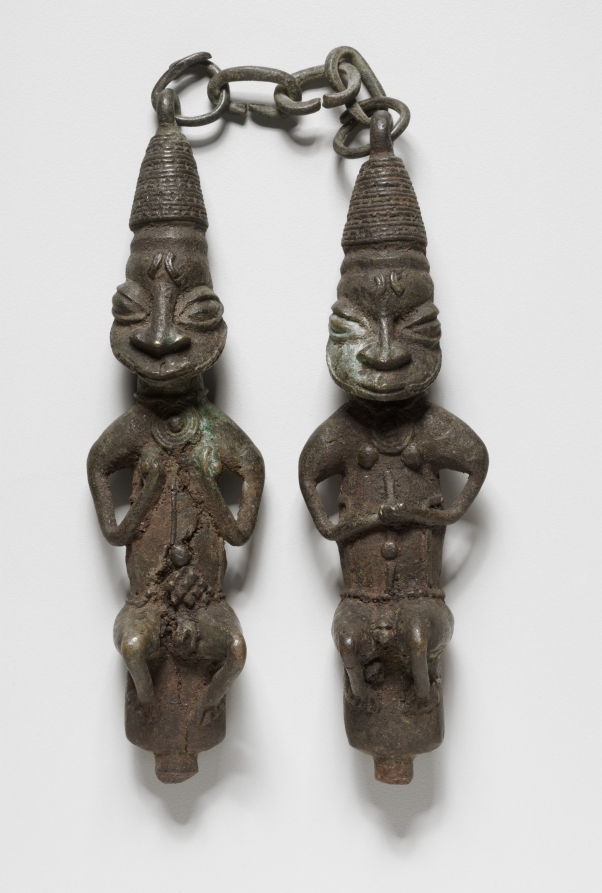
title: Pair of Ritual Staffs (ẹdan Ògbóni)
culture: Africa, West Africa, Nigeria, Yorùbá-style maker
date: possibly 1800s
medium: Copper alloy and iron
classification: Sculpture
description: The chain connecting these two figures allows them to be worn in public by a member of the Ògbóni or Òṣùgbó association as authority emblems. The male on the right gives the association’s typical salute by clasping his left fist on the right one, while the female on the left holds her breasts as a sign of welcome and generosity. The use of copper alloy and iron expresses Ògbóni/Òṣùgbó's concerns with longevity and durability.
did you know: Imagine how this would look when its owner wore it; the chain would go around the back of the neck and the figures would rest on their chest.